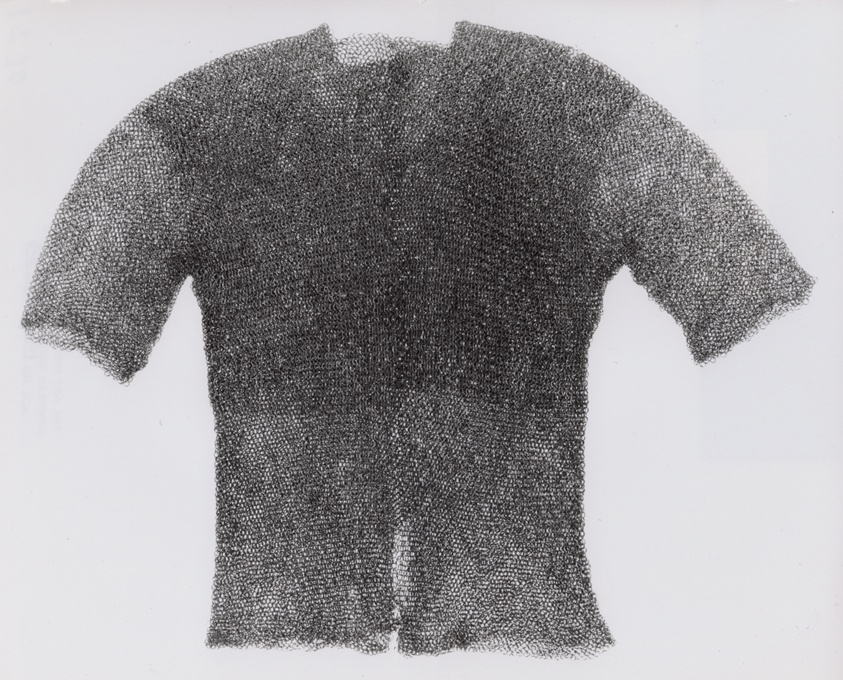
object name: Armor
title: Shirt of Mail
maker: European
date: mid–16th century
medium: Iron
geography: Middle East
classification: suit-element; armor; arms and armor